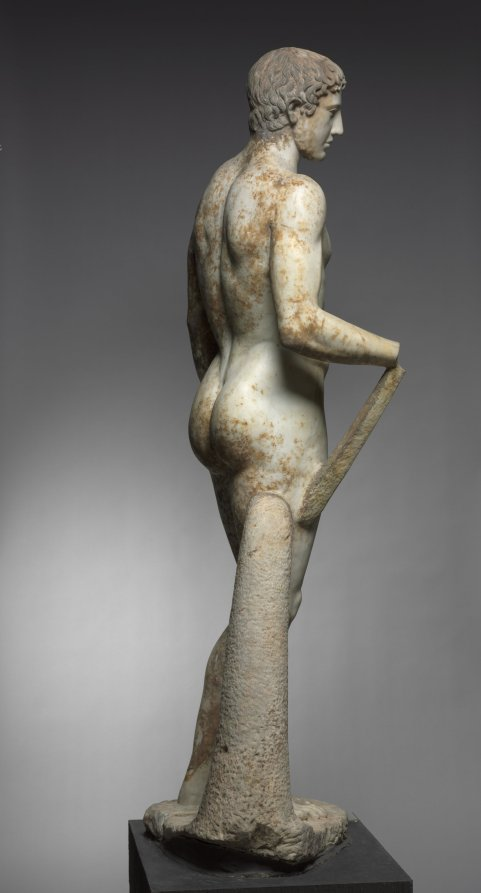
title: Statue of an Athlete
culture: Italy, Roman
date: 1–100 CE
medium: marble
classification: Sculpture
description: This idealized athlete recalls Greek sculptural types invented and popularized during the 400s BC. Large-scale athletes and other sculptures like this were originally created by famous artists as sanctuary dedications. Centuries later, they were widely copied and adapted by Roman sculptors, whose clients sought their own versions of earlier masterpieces. Working in marble rather than bronze, these sculptors added certain elements for stability, such as the struts and the large tree trunk beside the right leg here. Sculptures like this one are profoundly complex, made by and for Romans but descended from Greek ancestors.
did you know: For many years, this sculpture stood in the rotunda of the Cleveland Museum of Art.